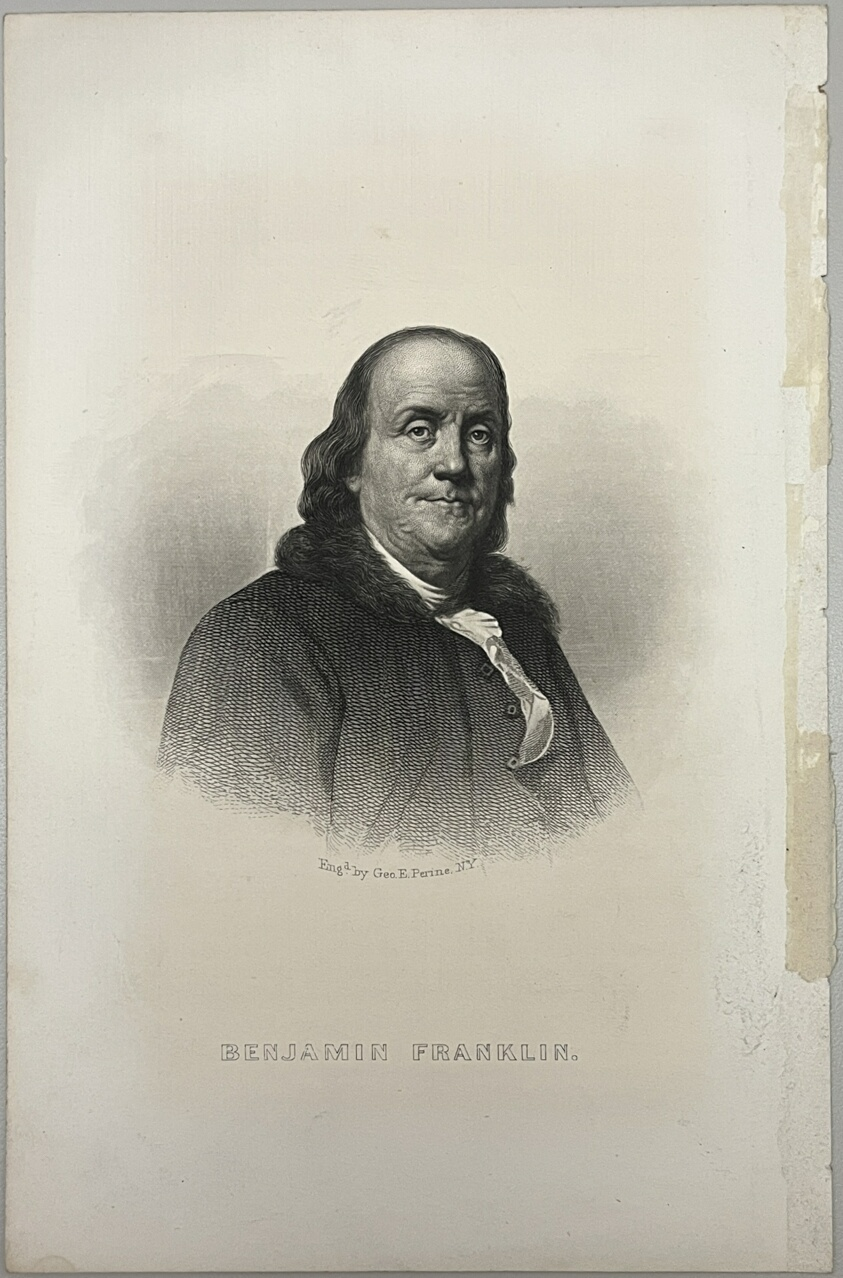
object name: Print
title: Benjamin Franklin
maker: George Edward Perine (American, 1837-1885); possibly after James Barton Longacre (American, 1794-1869); possibly after Antoine N. B. Graincourt (French, 1748-1823); possibly after Joseph-Siffrein Duplessis (French, 1725-1802)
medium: Steel engraving on paper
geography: United States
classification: reproduction; print; prints and drawing